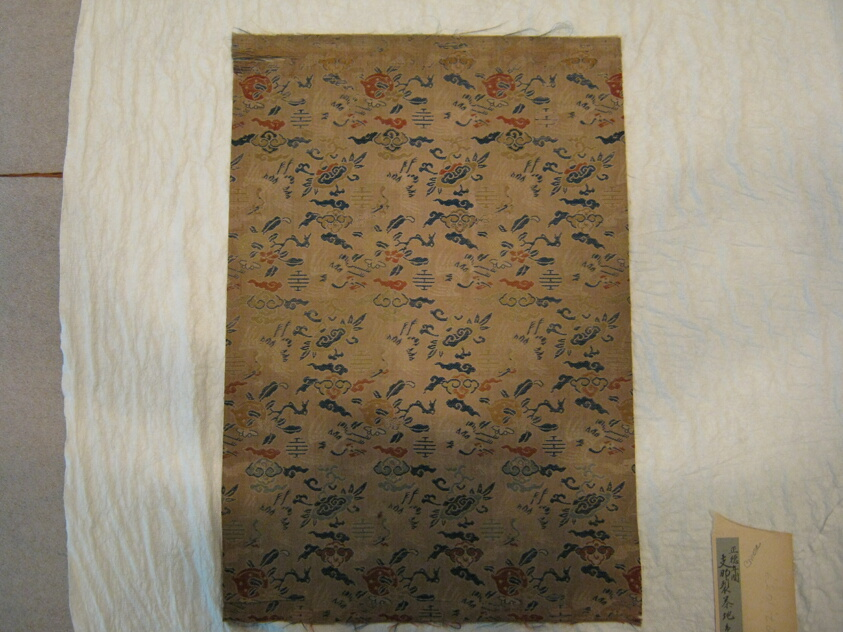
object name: Textile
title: Fragment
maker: Possibly China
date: 1775/1825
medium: Silk, plain weave with secondary binding warps tying supplementary self-patterning ground wefts in twill interlacings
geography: China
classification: textile; weaving